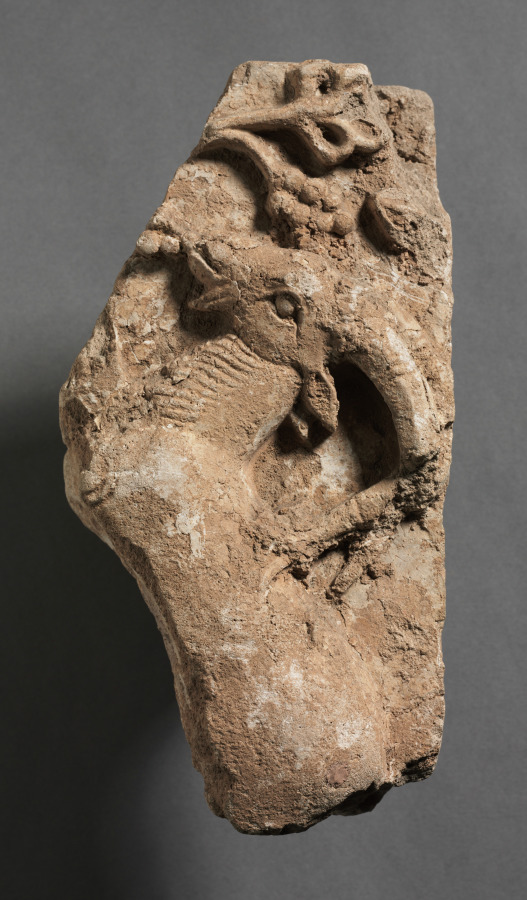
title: Ibex Eating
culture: Iran, Sasanian Empire (224–651 CE)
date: c. 400–600 CE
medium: stucco (gypsum plaster) with traces of paint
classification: Sculpture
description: From about 224 CE until about 650 CE, the Sasanian kings ruled a rich and powerful empire that stretched from Iran and Iraq to Afghanistan and Georgia (Russia). The Sasanians, named for Sasan, their first king, controlled parts of the lucrative Silk Route, and with their accrued wealth they built great palaces furnished with luxurious silks and lavish vessels made of silver mined in their own territories. The Sasanians were Zoroastrians—worshippers of Ahuramazda, the spirit of Good, who was in constant struggle with Evil. On some of the works of art here, the hunting scenes or the scenes of combat between two animal species or between human and animal reflect Zoroastrian beliefs. On other works, scenes of wine drinking, dancing, and other forms of revelry are similar to favorite decorations on Greek and Roman vases in pottery and precious metal. The Sasanians, who ruled the major trading routes through Central Asia, decorated their palace architecture with painted stucco. A favorite motif of many ancient Near East Cultures depicted goats standing on their hind legs to eat leaves or berries from the Tree of Life.